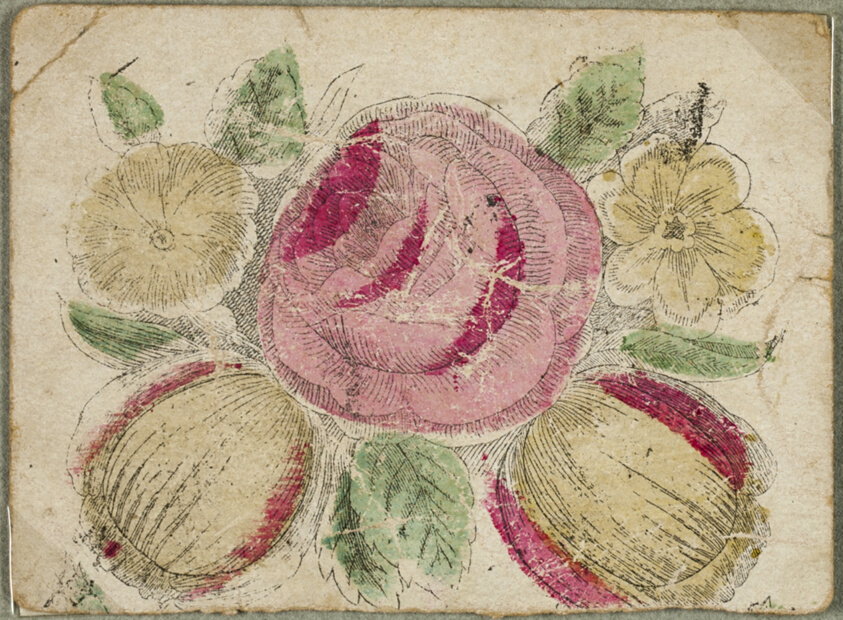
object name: Print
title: Untitled Valentine (Pink and Yellow Flowers)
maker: Unknown Artist; American or English, 19th century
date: c. 1830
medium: Etching with hand-coloring on cream wove paper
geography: United States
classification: collage; valentine; prints and drawing; print